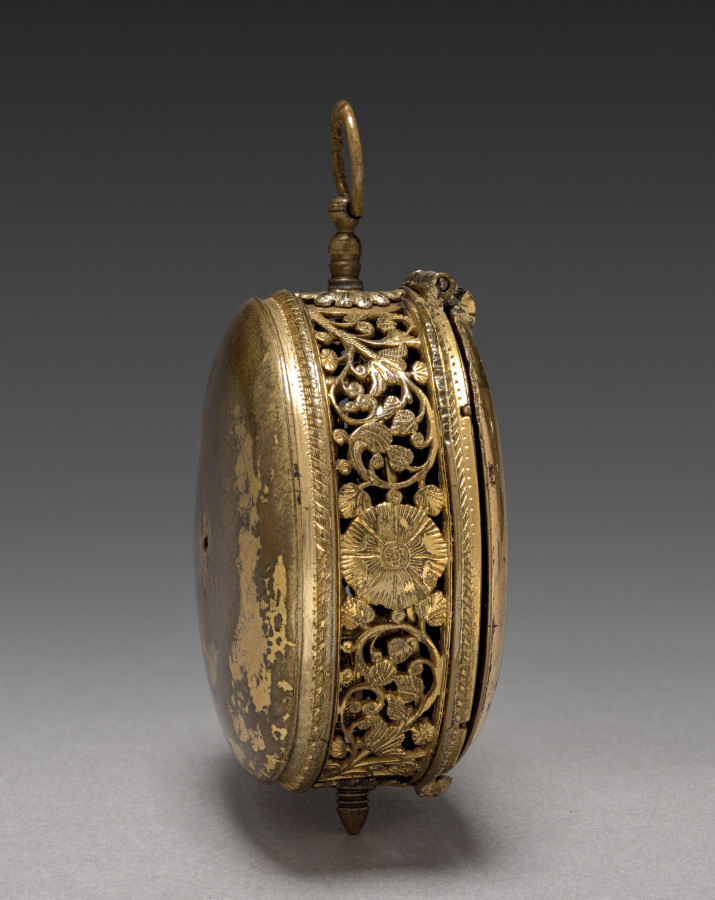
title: Watch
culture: Germany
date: 1600s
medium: gilded metal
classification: Jewelry